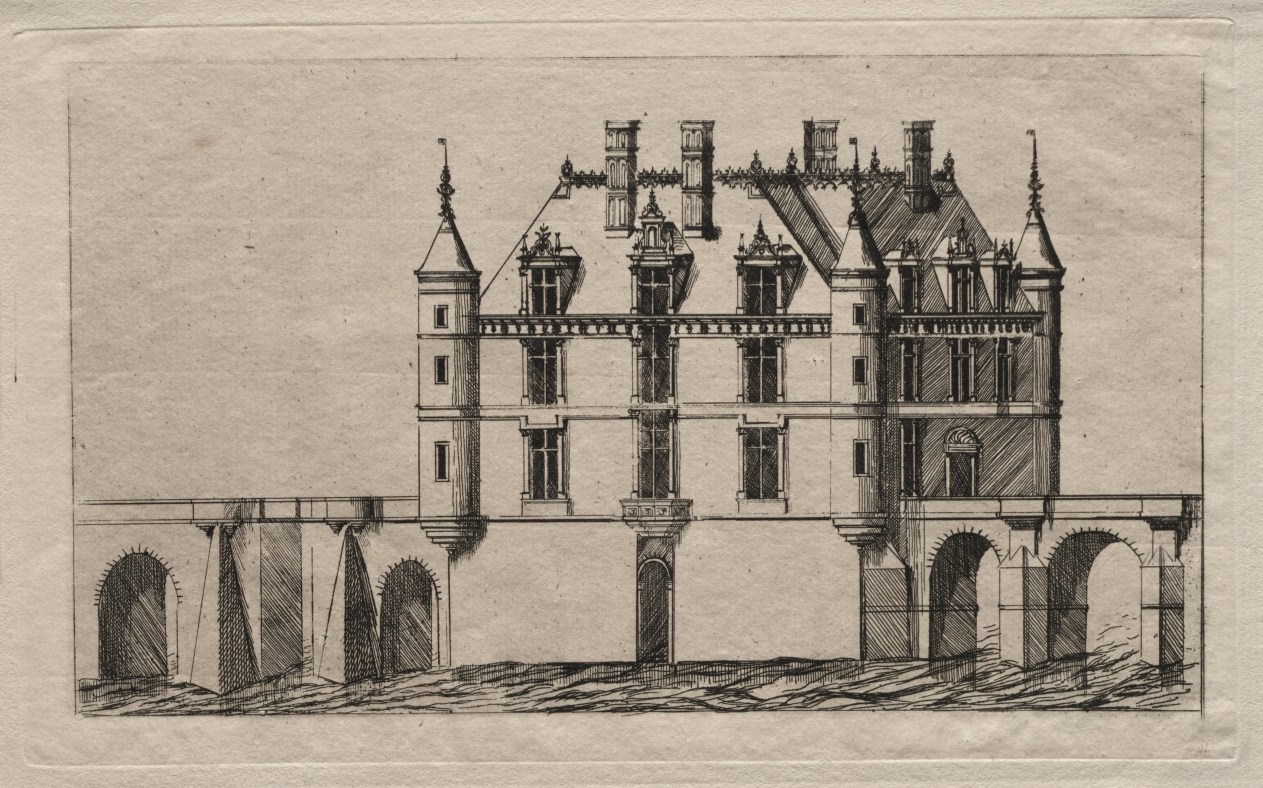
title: The Chateau of Chenonceau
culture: France, 19th century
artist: Charles Meryon (French, 1821–1868)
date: 1856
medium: etching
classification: Print